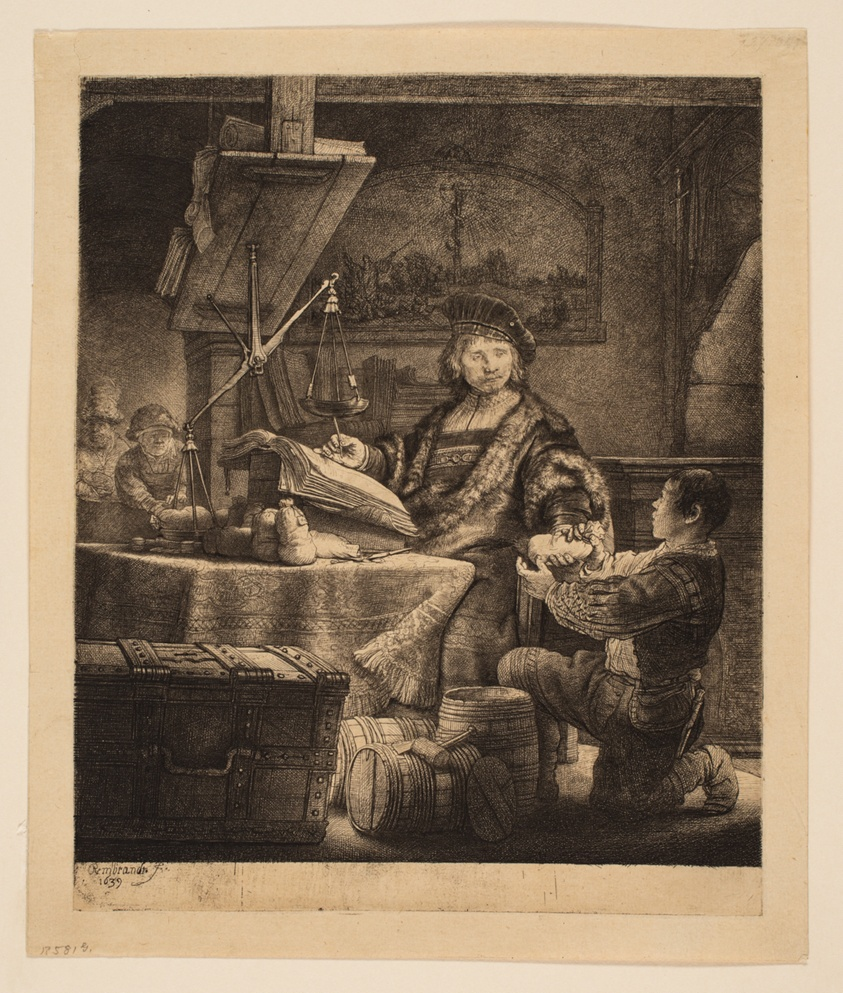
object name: Print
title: Jan Uytenbogaert, Receiver-General ("The Goldweigher")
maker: Rembrandt van Rijn (Dutch, 1606-1669)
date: 1639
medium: Etching and drypoint on Japanese paper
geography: Holland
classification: etching; print; prints and drawing; paper; drypoint